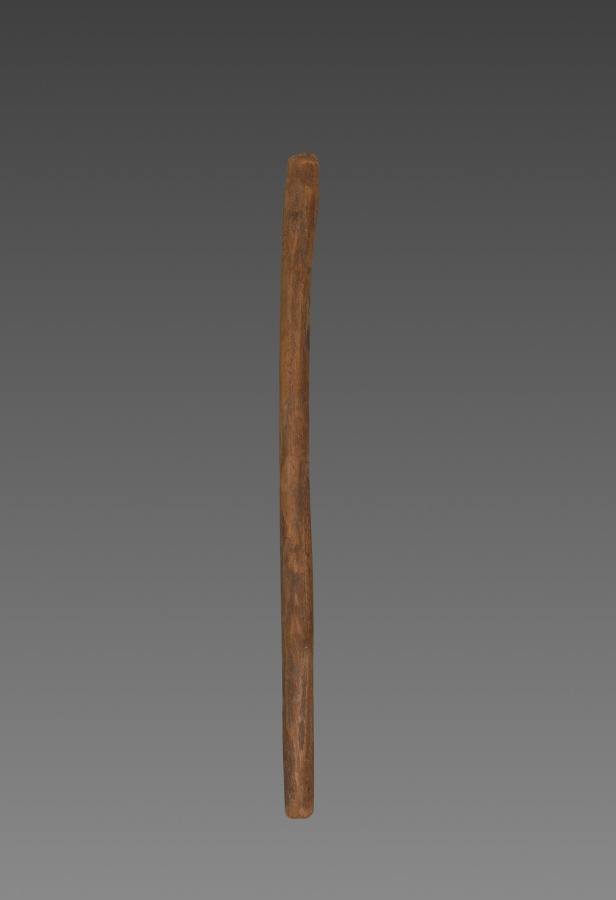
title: One of Three Pieces of an Arrow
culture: Egypt, First Intermediate period (2123–2040 BCE)–Middle Kingdom (2040–1648 BCE)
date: 2123–1814 BCE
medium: wood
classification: Arms and Armor